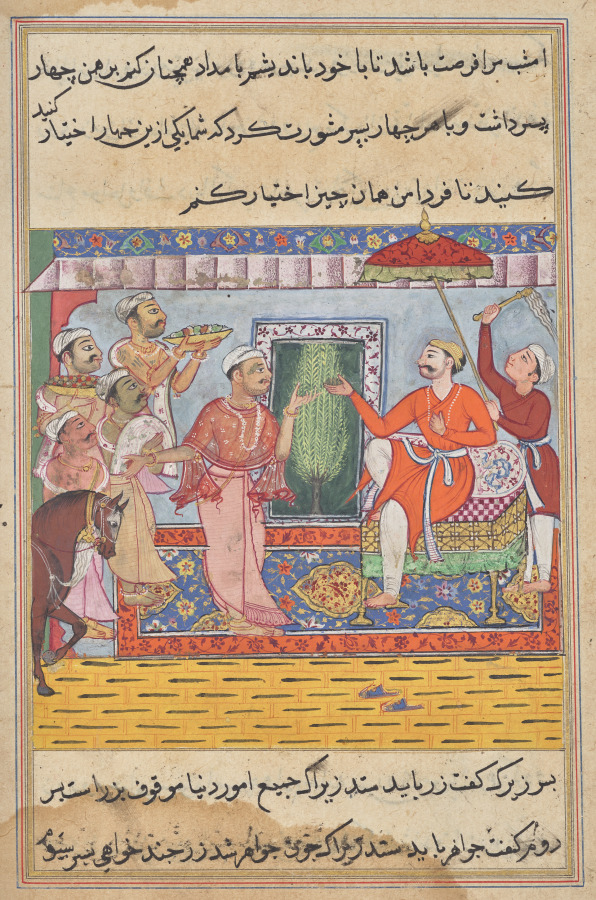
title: The Brahman, unable to select from the four gifts of the king of the Ocean seeks the Raja’s advice, from a Tuti-nama (Tales of a Parrot): Eleventh Night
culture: Mughal India, court of Akbar (reigned 1556–1605)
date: c. 1560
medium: gum tempera, ink, and gold on paper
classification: Painting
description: Behind the Brahman, four men present gold, jewels, a robe and a horse. The enthroned Raja has offered one of these gifts to the Brahman. However, after consulting with his sons, the Brahman is unable to choose the best one and returns to the Raja in frustration. The Raja, pleased with the Brahman’s honesty, allows him to keep all four.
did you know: The tree suggests a garden through the open door in the back wall.